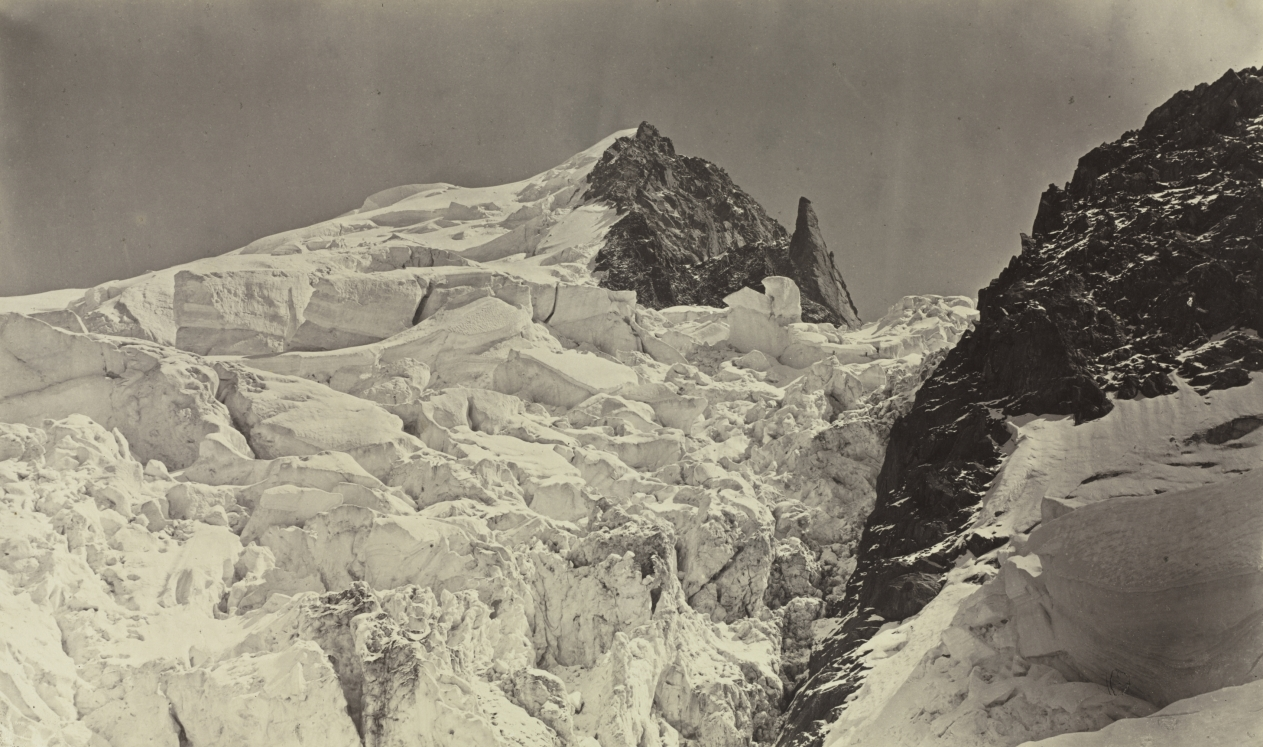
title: Mount Maudit, Savoy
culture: France, 19th century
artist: and Auguste-Rosalie Bisson (French, 1826–1900)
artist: Louis-Auguste Bisson (French, 1814–1876)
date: 1860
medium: albumen print from wet collodion negative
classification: Photograph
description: Many major peaks in the Alps were first summited in the 1850s and 1860s, which aroused public interest in the mountains and created a demand for images of them. The Bisson brothers’ photograph of Mount Maudit—which translates as “cursed mountain”—makes the 14,649-foot peak seem inaccessible. In fact, it was not summited until 1878. Photographing at high altitudes necessitated climbing while carrying heavy equipment, including large glass plates and a portable darkroom, and required extraordinary technical prowess and speed in working with the chemicals at low temperatures.